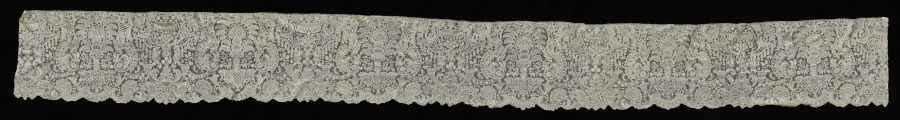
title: Lace Flounce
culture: Belgium, Brussels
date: early 1700s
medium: Bobbin lace (Point d'Angleterre)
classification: Lace